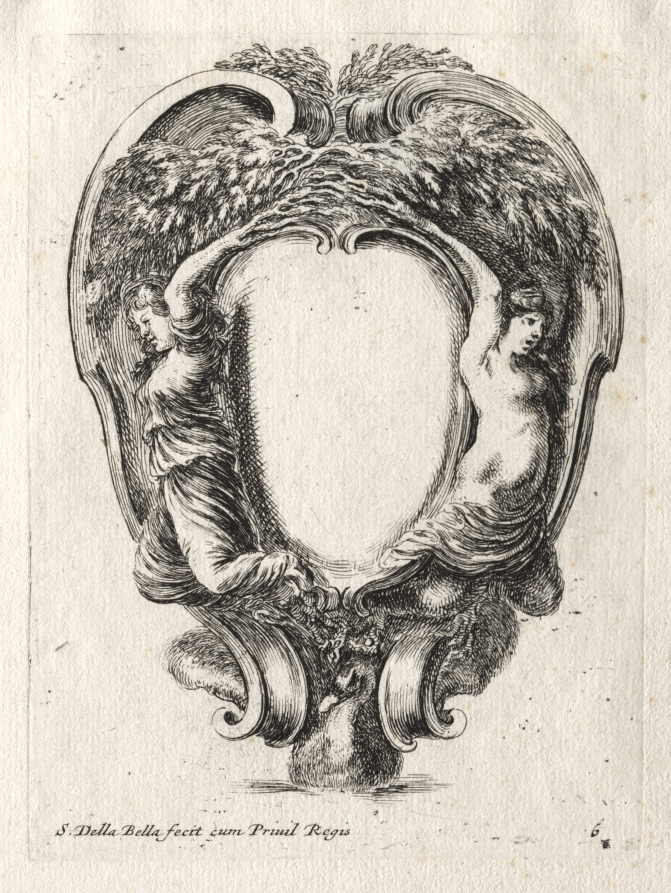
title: New Model for a Cartouche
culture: Italy, 17th century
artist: Stefano Della Bella (Italian, 1610–1664)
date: 1647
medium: etching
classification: Print